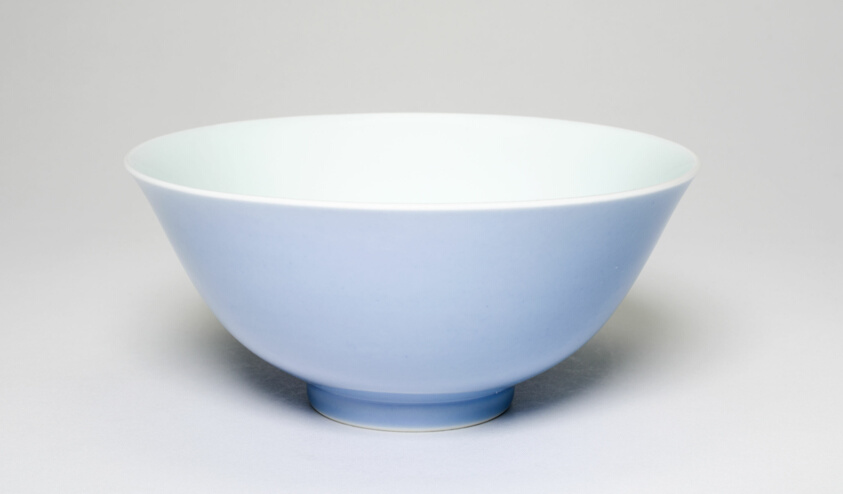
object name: Decorative Arts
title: Bowl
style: Chinese (culture or style)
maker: China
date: Qing dynasty (1644–1911), Yongzheng reign mark and period (1723–1735)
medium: Porcelain with clair de lune glaze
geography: China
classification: bowl; porcelain; dish (vessel); asian art; ceramics; decorative arts